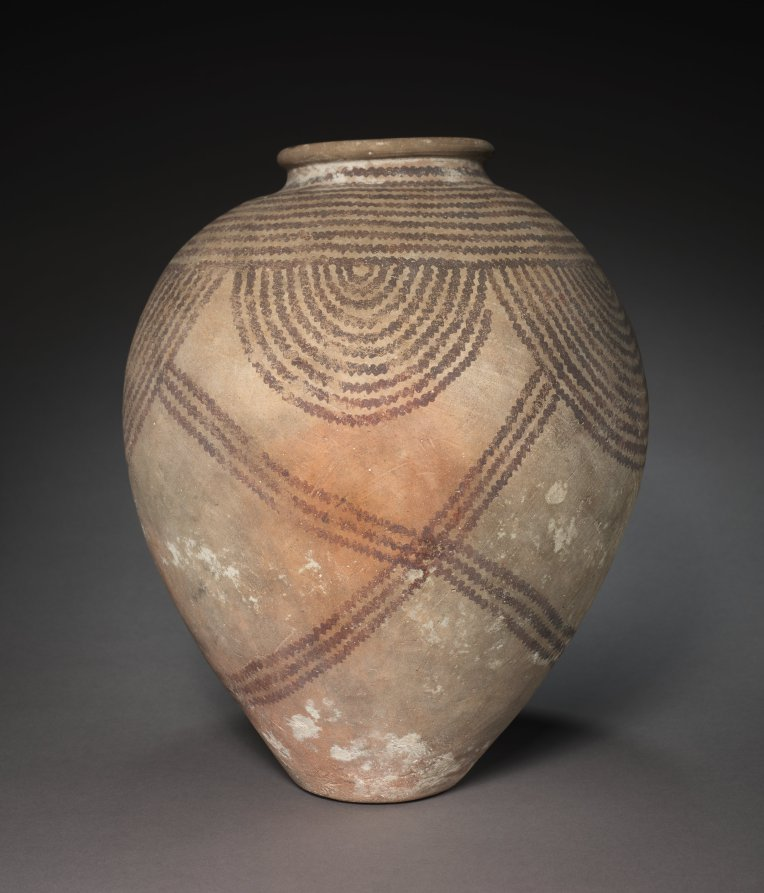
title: Decorated Jar with Rope Pattern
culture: Egypt, Predynastic (5000–2950 BCE), Naqada IId (3650–3300 BCE)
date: 4000–3000 BCE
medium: marl clay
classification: Vessels